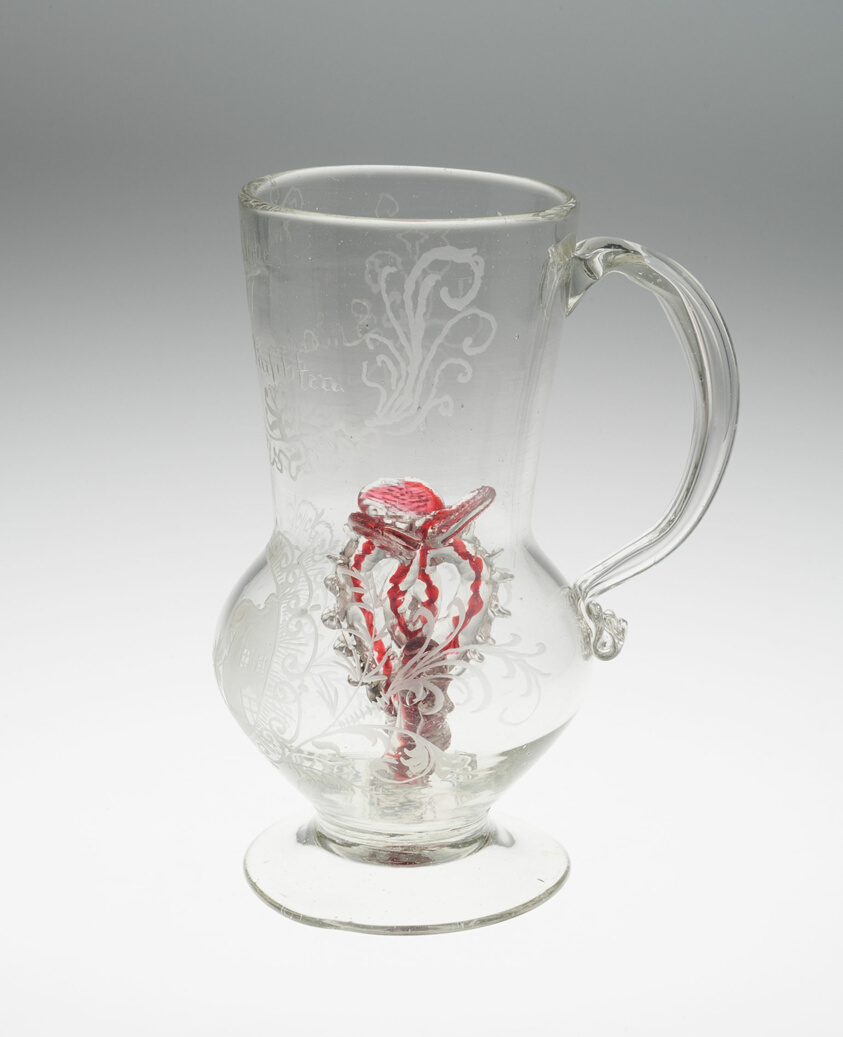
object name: Glass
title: Tankard (Trick Glass)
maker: Czech Republic (Formerly Bohemia)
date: 1740/60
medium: Glass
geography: Bohemia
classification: drinking vessel; glass; european decorative arts